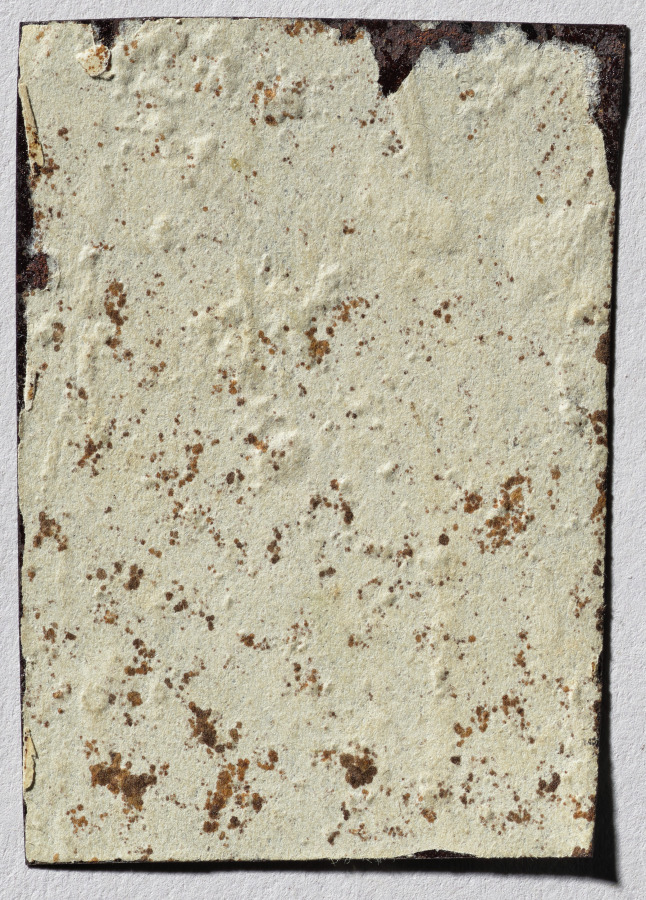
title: Untitled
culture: America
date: c. 1860s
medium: tintype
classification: Photograph